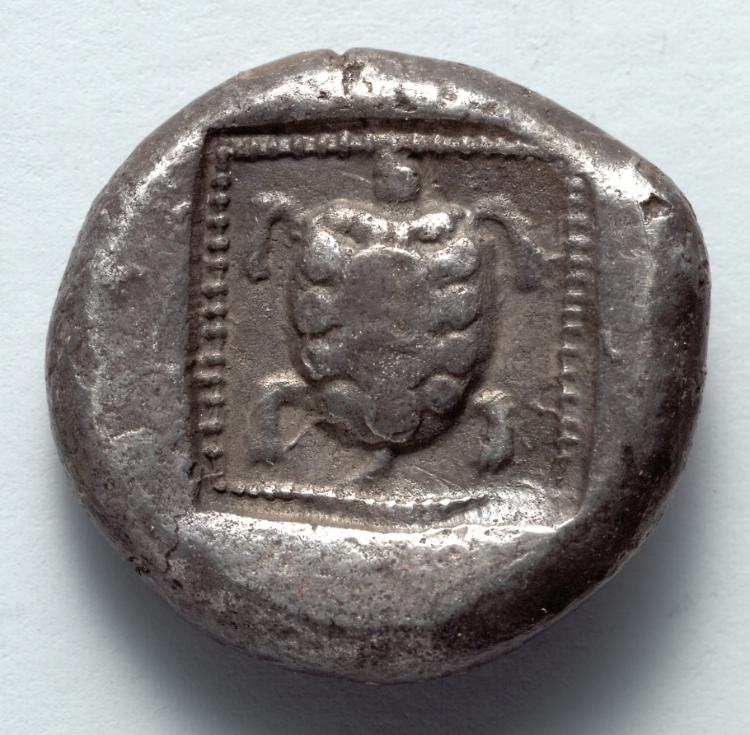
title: Stater: Tortoise (reverse)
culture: Greece, Lycia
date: 500–460 BCE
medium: silver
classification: Coins